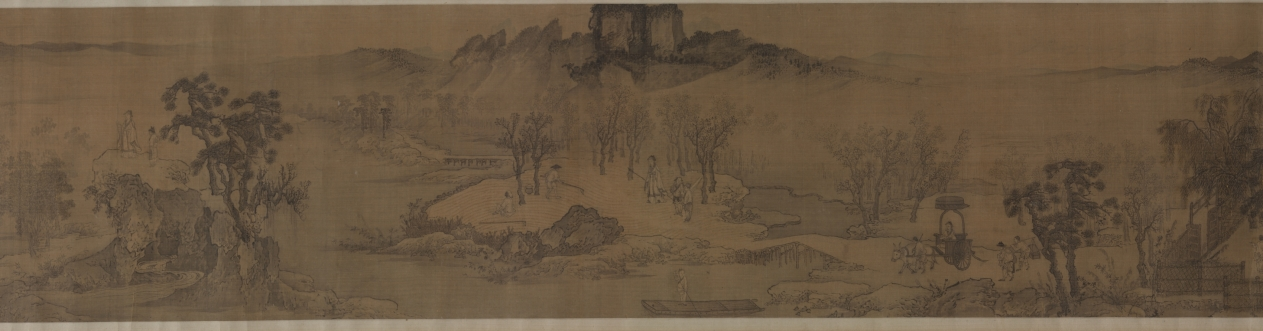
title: Tao Yuanming's Return Home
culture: China, Yuan dynasty (1271-1368)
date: 1300s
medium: Handscroll; ink and slight color on silk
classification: Painting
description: Tao Yuanming's revered poem "Return Home 歸去來辭 (Gui qu lai ci)" powerfully conveys his desire to leave bureaucratic life for the simplicity and authenticity of nature. This sentiment has deeply resonated with generations of Chinese scholars, making it a popular theme in paintings. This handscroll uses continuous narrative depicting Tao in multiple scenes from the poem. Starting on the right, the poet travels to his home. His children wait by the gate, while his wife pauses to tidy her hair before welcoming him. Then, free from the burdens of official service, Tao spends time in both nature and his cottage, where he can again enjoy wine, music, and books.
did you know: Poet Tao Yuanming 陶淵明 (c. 365–427 CE) returned to a secluded life instead of pursuing a civil service career.